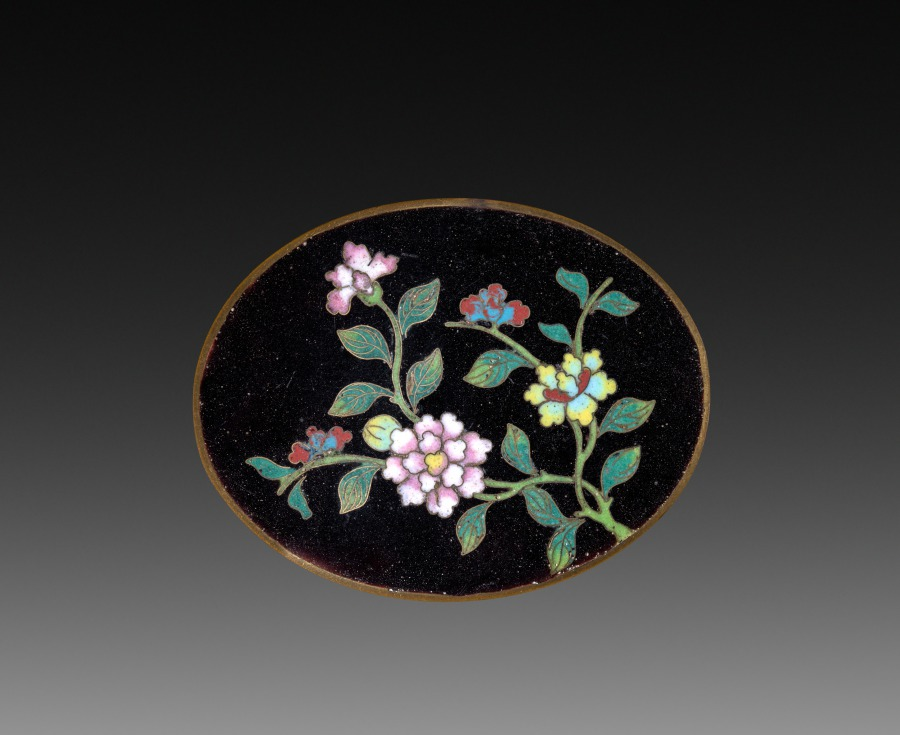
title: Belt Buckle with Flowers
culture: Japan, Meiji period (1868–1912) or Taishō period (1912–26)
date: early 1900s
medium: cloisonne enamel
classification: Enamel